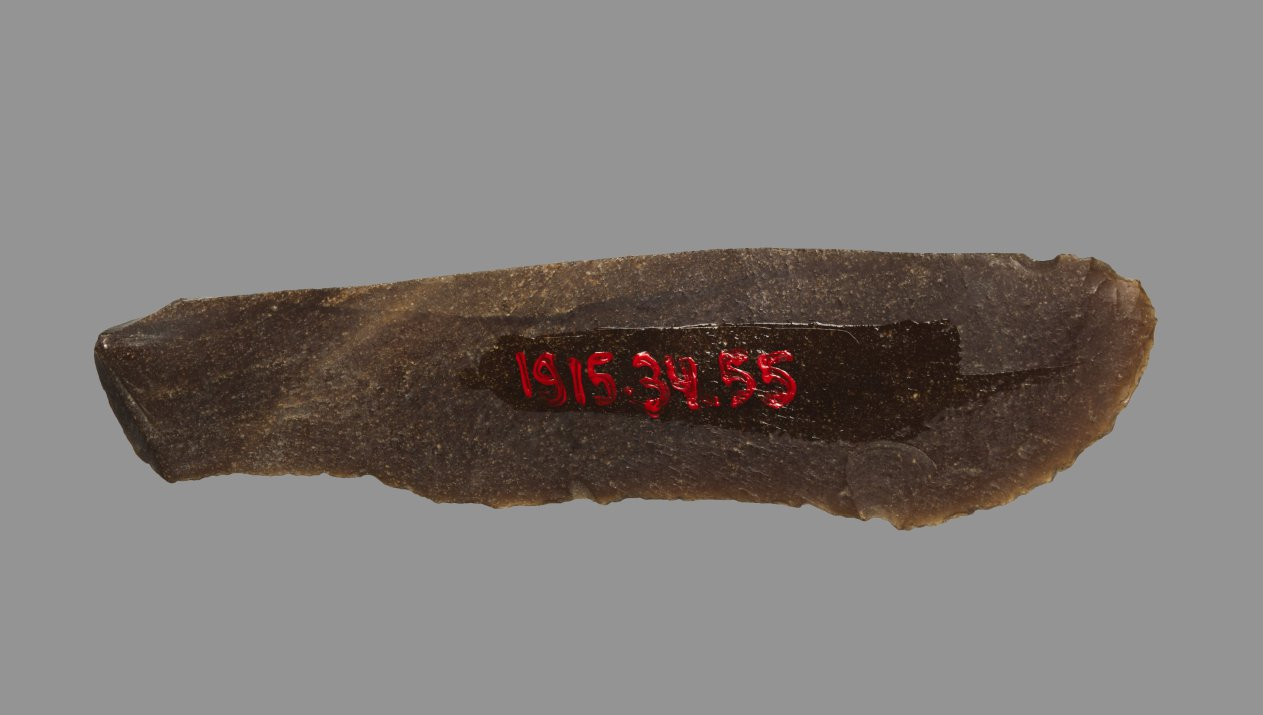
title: Sickle Blade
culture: Egypt, Middle Kingdom (2040–1648 BCE), Dynasty 12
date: 1980–1801 BCE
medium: flint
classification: Implements